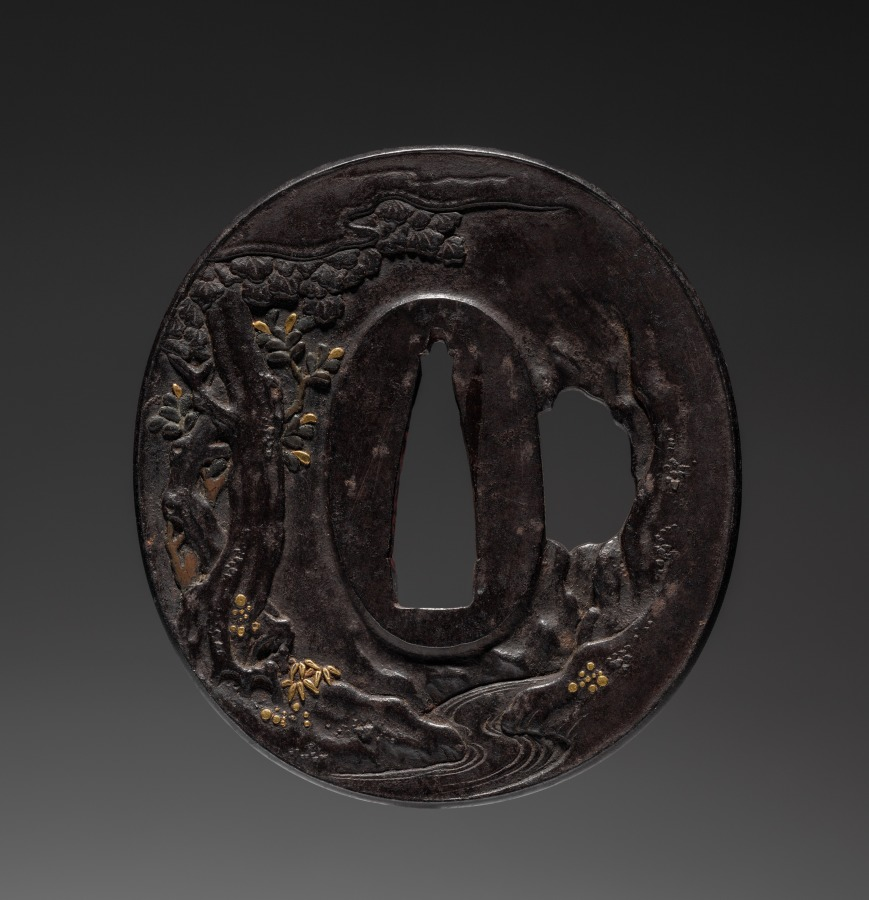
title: Sword Guard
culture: Japan, Edo period (1615–1868)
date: early 1800s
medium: iron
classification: Arms and Armor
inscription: Signature: Hirochika